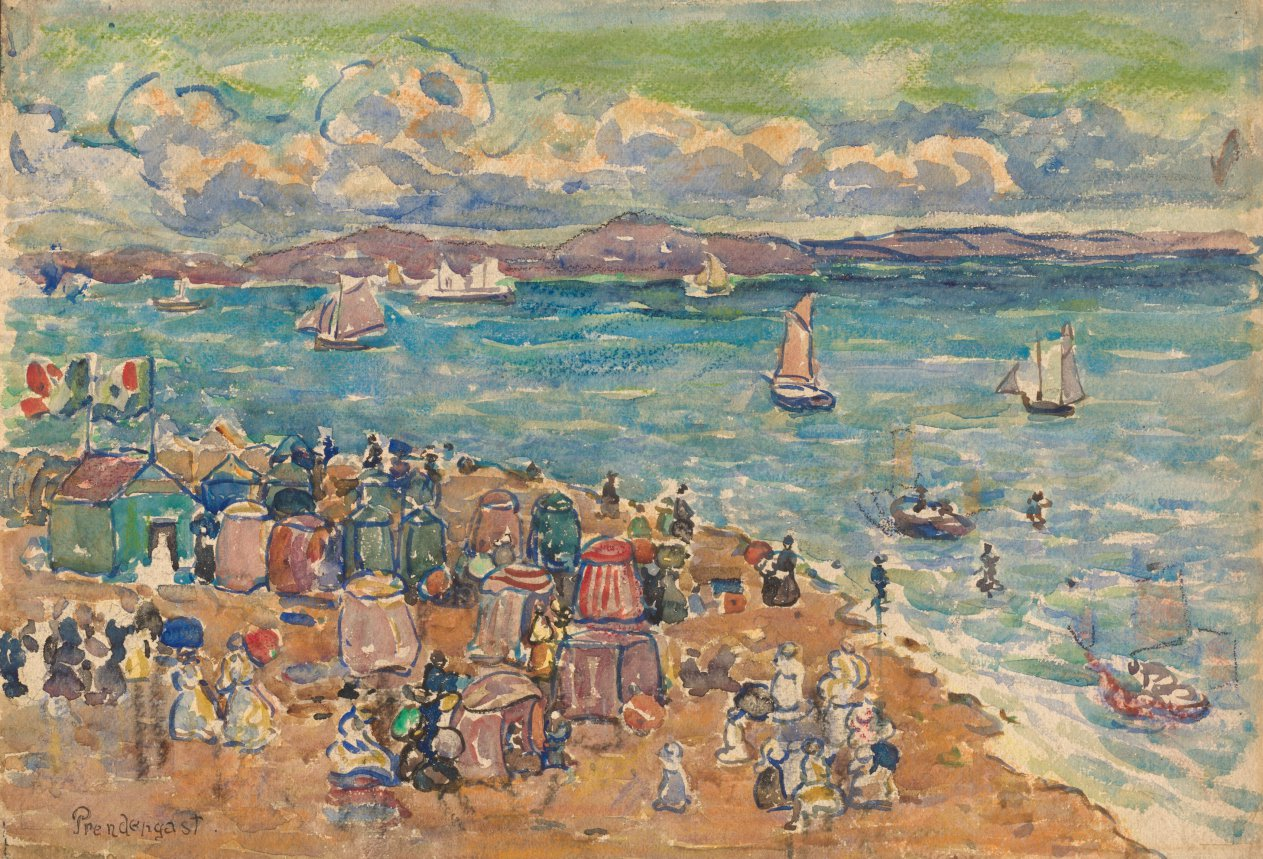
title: Beach Scene, St. Malo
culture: America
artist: Maurice Prendergast (American, born Newfoundland [now Canada], 1858–1924)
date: c. 1909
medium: watercolor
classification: Drawing